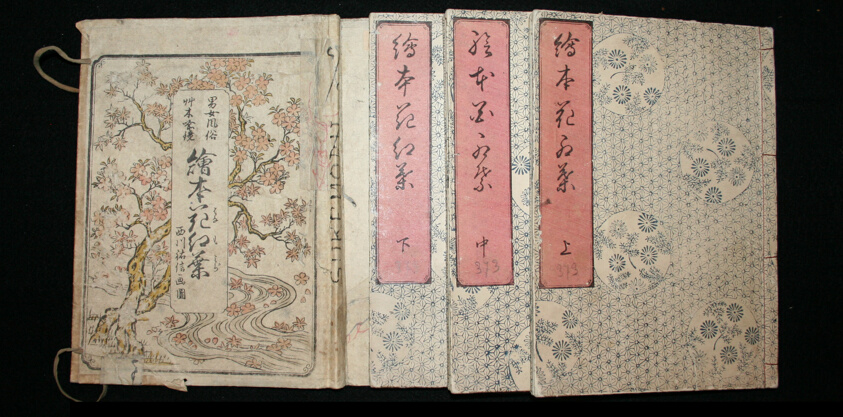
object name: Book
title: Sukenobu ehon hana momiji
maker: Nishikawa Sukenobu (Japanese, 1671-1750)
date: 1770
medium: Woodblock printed books, 3 volumes with wrapper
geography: Japan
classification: book